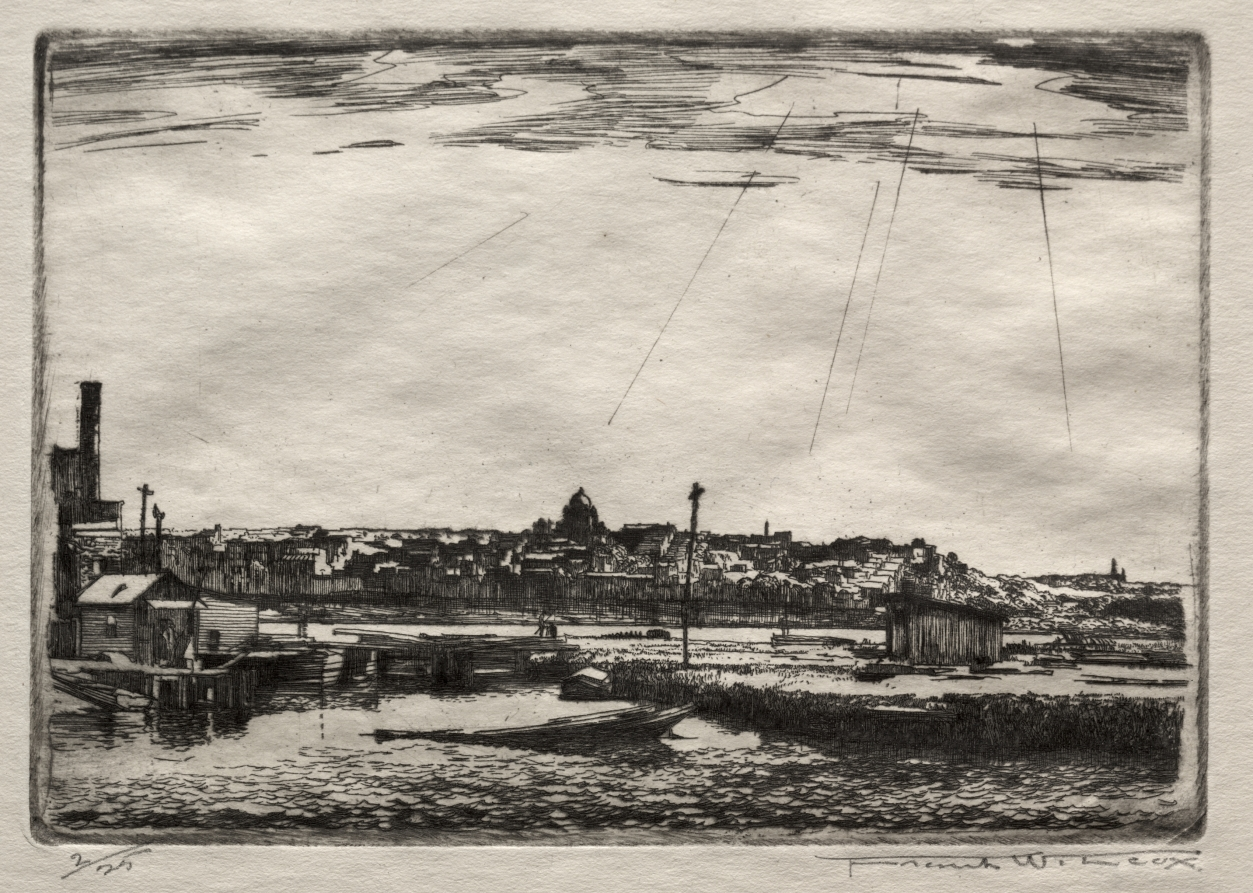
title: Flats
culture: America, Ohio, Cleveland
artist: Frank Wilcox (American, 1887–1964)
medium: etching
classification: Print